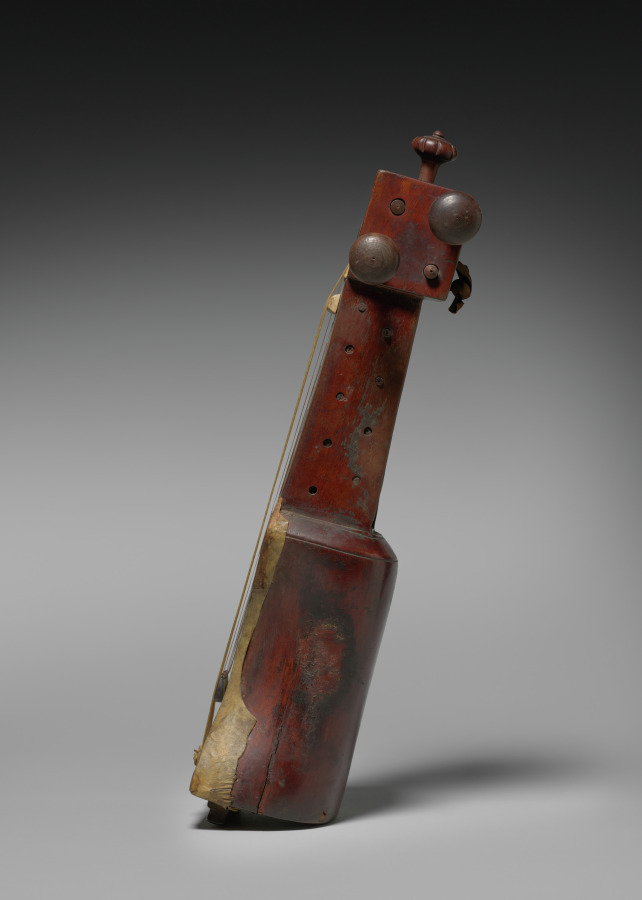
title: Sarangi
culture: East India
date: c. 1850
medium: Wood, parchment, bone or ivory, gut, and copper strings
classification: Musical Instrument